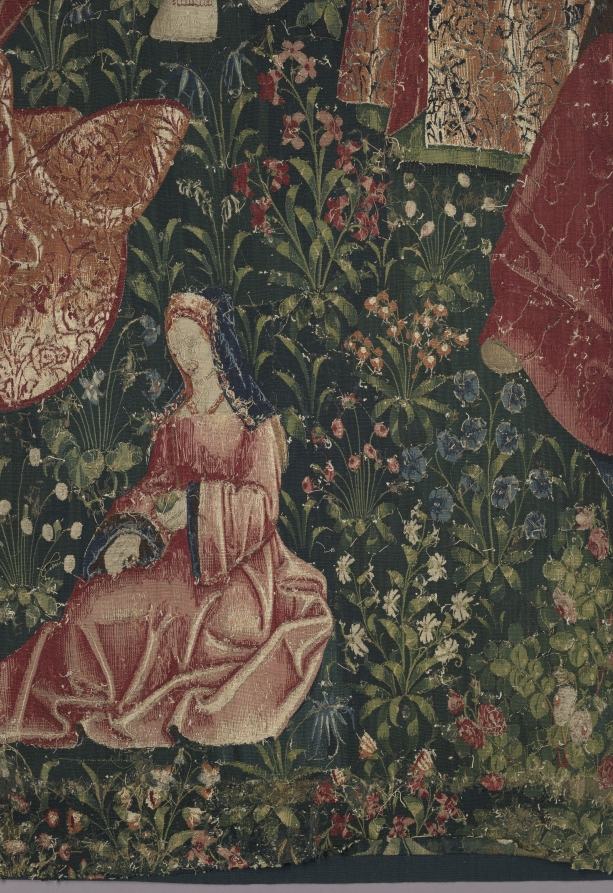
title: Youth (from Chateau de Chaumont set)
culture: France, Lyon(?), early 16th century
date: 1512–15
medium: silk and wool; tapestry weave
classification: Tapestry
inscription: French verse in Gothic letters translates as follows: Youth triumphs while its heart is healthy, And when it seems to hold all in its hand. But this triumph is without eternity. Here one sees the example full well: Those who are happy hide death in thier heart. Let the young heed this warning.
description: Louise of Savoy (1476-1531), queen mother of King Francis I, is depicted here in a sumptuous brocaded velvet in the center. She addresses youthful figures including Éléonore, Pierre Sala’s daughter who is facing her future husband, Hector. On the right, King Louis XII (died 1514) stands in front of the Chateau Langais where he had married Anne of Brittany. Above is Hector’s deceased father with a partially concealed skull under his robe, while a woman expresses surprise at the sight. The verse in Old French at the top states that youthful happiness is not eternal: Youth makes sounds as long as its heart is healthy, And thinks that it holds all in its hand. But this triumph is not eternal. Here you see clearly an example: He that is happy has death in his breast. Of this you people should take note.